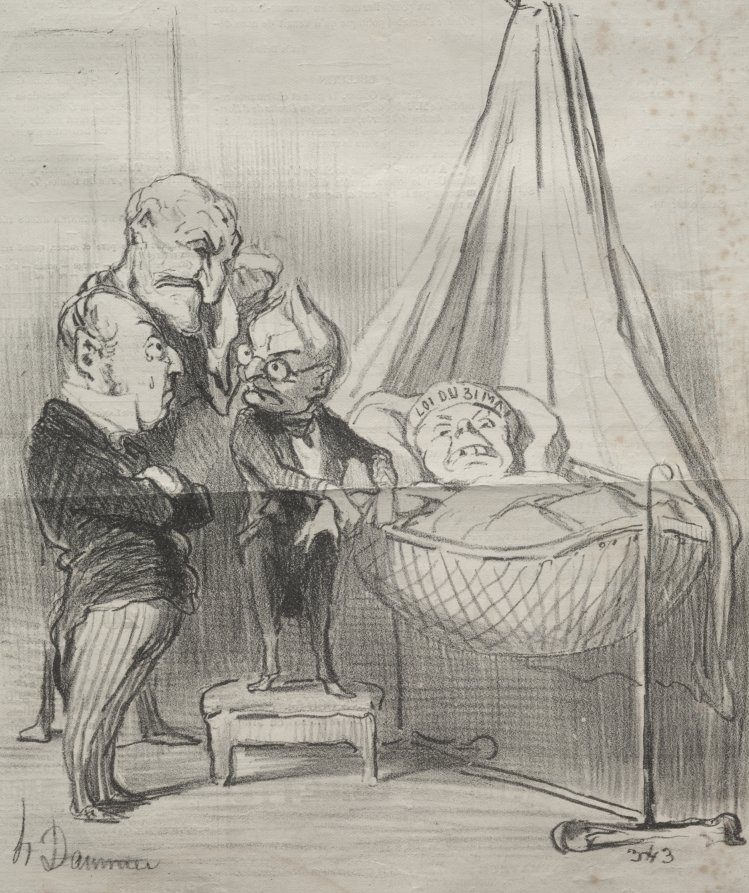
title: No doubt, she is very ill!...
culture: France, 19th century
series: News of the Day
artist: Honoré Daumier (French, 1808–1879)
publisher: Aubert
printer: Ch. Trinocq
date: 1851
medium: lithograph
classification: Print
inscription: Above image, printed: ACTUALITÉS. / 248; Below image, printed: -Décidément elle est bien malade!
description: This print was published in Le Charivari (November 13, 1851) as plate 248 from the series News of the Day.